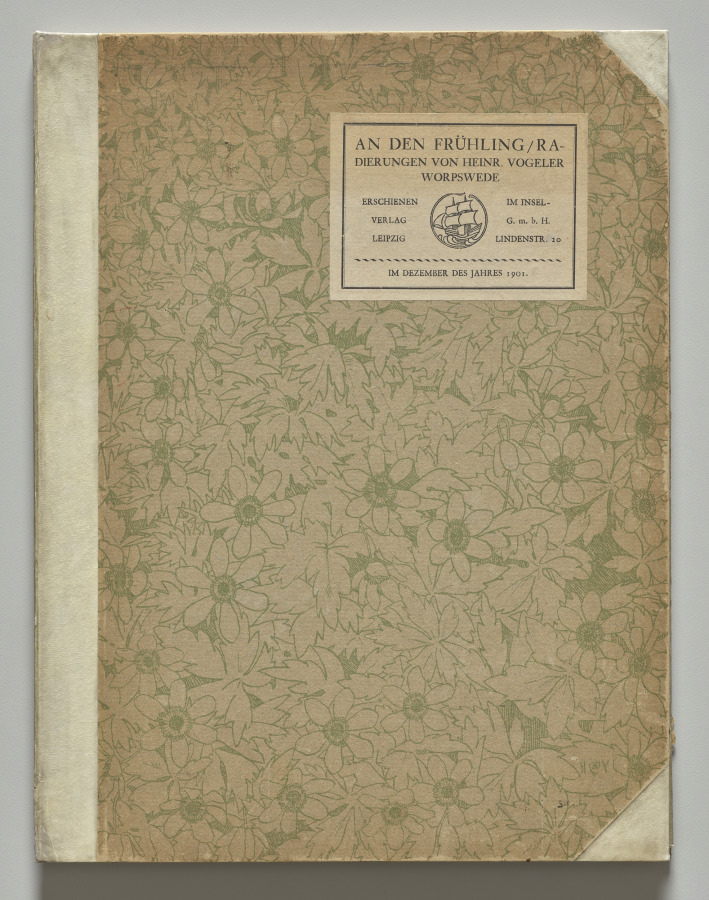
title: In Spring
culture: Germany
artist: Heinrich Vogeler (German, 1872–1942)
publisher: Der Insel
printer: Otto Felsing (German)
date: 1899, published 1901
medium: Portfolio of 10 etchings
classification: Portfolio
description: Heinrich Vogeler was instrumental in the development of Jugendstil, or art nouveau, in Germany. This international movement advocated for an integration of the arts and their application to the visual culture of the everyday—including design, household goods, and illustrated books. In Spring features landscapes that loosely evoke the times of day, beginning with an image of the artist encountering a lark in the morning and concluding with the night sky over his home. Vogeler collaborated with the vanguard journal Die Insel and controlled every aspect of the portfolio’s production, including its cover design, font, layout, paper, ink tone, and binding.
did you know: Heinrich Vogeler was active within an influential avant-garde artists’ colony in Worpswede, located in northeastern Germany, where he built a studio home that he conceived of as a total work of art, featured throughout these prints.